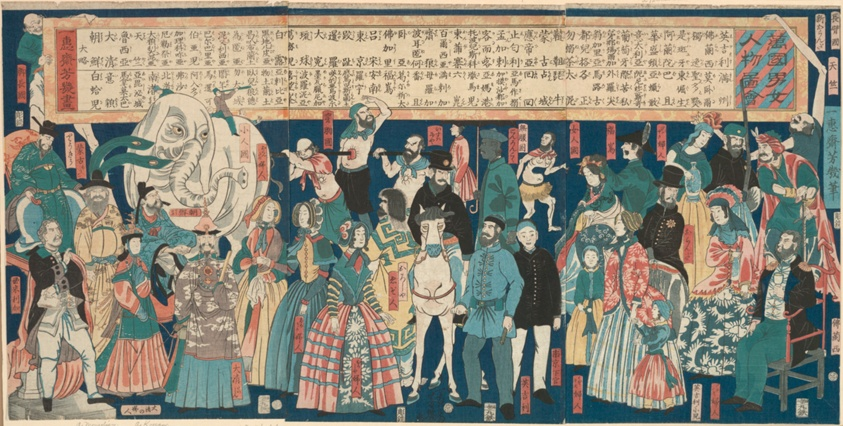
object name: Print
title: Picture of Men and Women from Many Countries (Bankoku danjo jinbutsu zue)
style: Japanese (culture or style)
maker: Ochiai Yoshiiku; Japanese, 1833-1904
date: 1861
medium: Color woodblock print; oban triptych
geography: Japan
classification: woodblock print; print; asian art